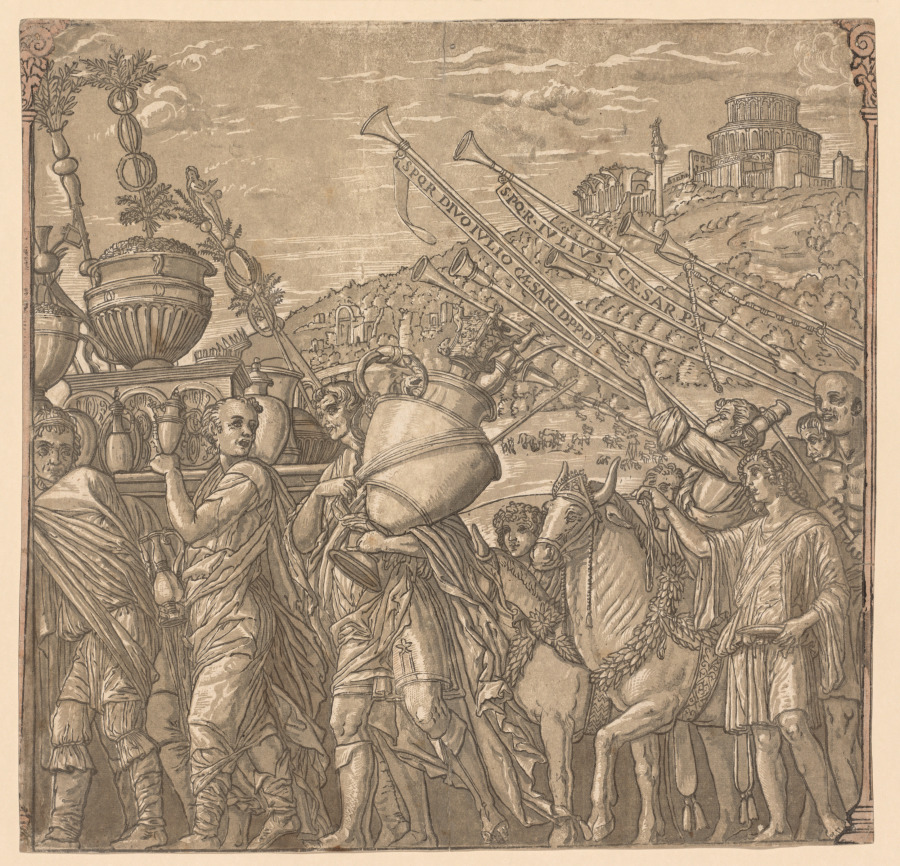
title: The Triumph of Julius Caesar: Soldiers Carrying Vases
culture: Italy, 16th century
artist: Andrea Andreani (Italian, about 1558–1610)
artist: after Andrea Mantegna (Italian, about 1431–1506)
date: 1593–99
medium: chiaroscuro woodcut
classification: Print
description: Commissioned by Duke Vincenzo Gonzaga, this series of chiaroscuro woodcuts reproduces Andrea Mantegna’s Triumph of Julius Caesar, painted a century earlier. The scenes imaginatively portray the triumphal procession of the renowned Roman general and consul Julius Caesar following his successful defeat of Gaul in 52 BC. Each section of the continuous frieze shows elements typical of these parades, sanctioned by the Roman Senate and described in ancient texts. The printed suite’s frontispiece features a portrait bust of Mantegna, and the text below boasts that the famous paintings attracted many viewers. People who owned sets of these woodcuts often tacked them up to create a decorative frieze. Andreani issued the prints with a sheet of classical columns that could be cut out and placed between the scenes. Two fragments of these columns, colored orange, still flank the fourth scene.